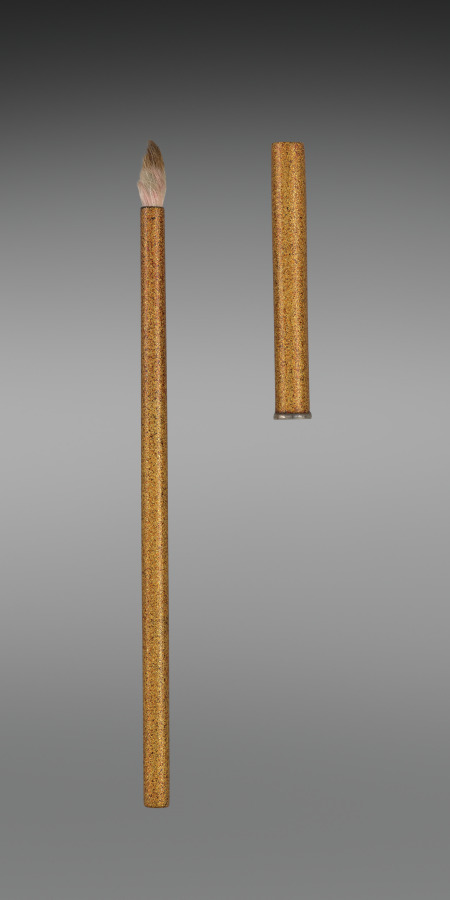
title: Writing Box (Suzuribako) with the “First Song” (Hatsune) Chapter from the Tale of Genji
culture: Japan, Meiji period (1868–1912)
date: early 1900s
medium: Lacquered wood with gold and silver sprinkled powder (maki-e), foil application (kirikane), and metal inlay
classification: Lacquer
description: The design of this box was inspired by an object in the 1639 lacquer wedding set of Chiyohime, the daughter of the shogun (ruler). Information about the set became available in the Meiji period, leading some lacquer artists to emulate its designs. This box features a scene from the chapter “First Song” (Hatsune) of the Tale of Genji, in which Prince Genji and his love Murasaki enjoy her garden. It incorporates the written characters for “first” (初, hatsu) and “sound” (音, ne), indicating the first song of the warbler in spring, associated with the new year—the water dropper for mixing the ink is in the shape of this bird.